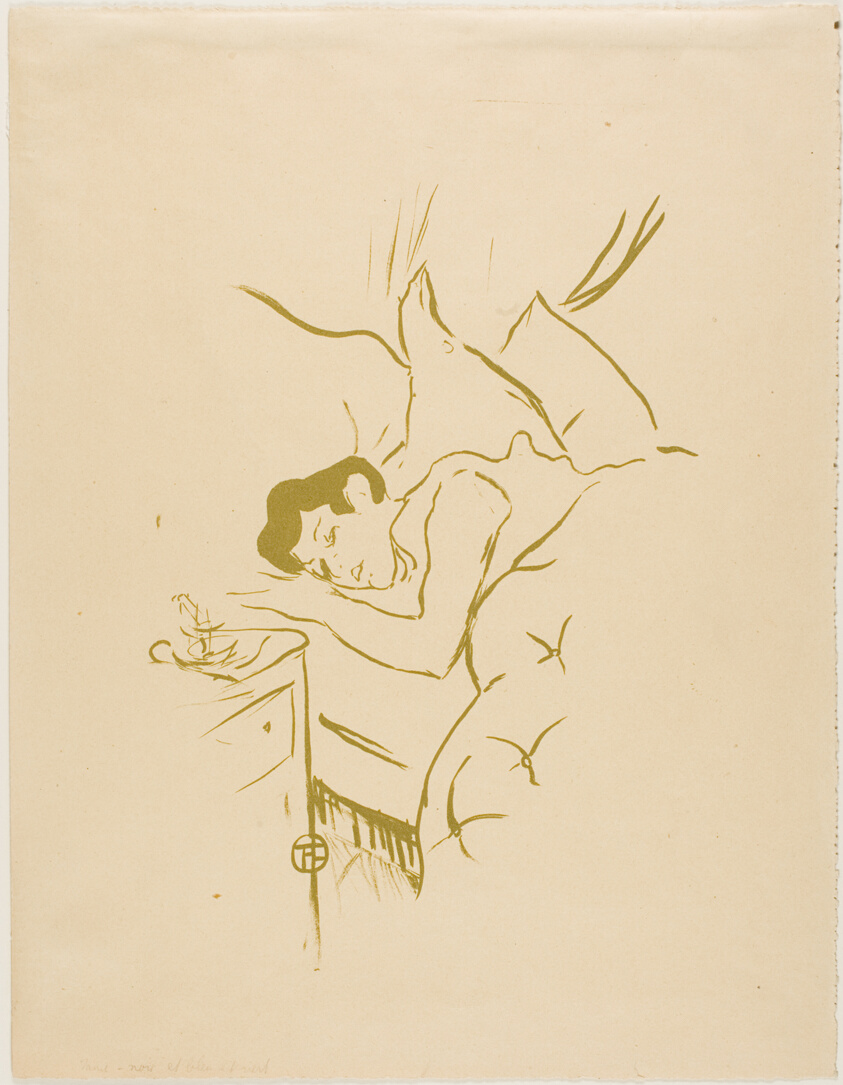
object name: Print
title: Your Mouth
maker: Henri de Toulouse-Lautrec (French, 1864-1901)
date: 1893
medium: Color lithograph on tan wove paper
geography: France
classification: lithograph; print; prints and drawing